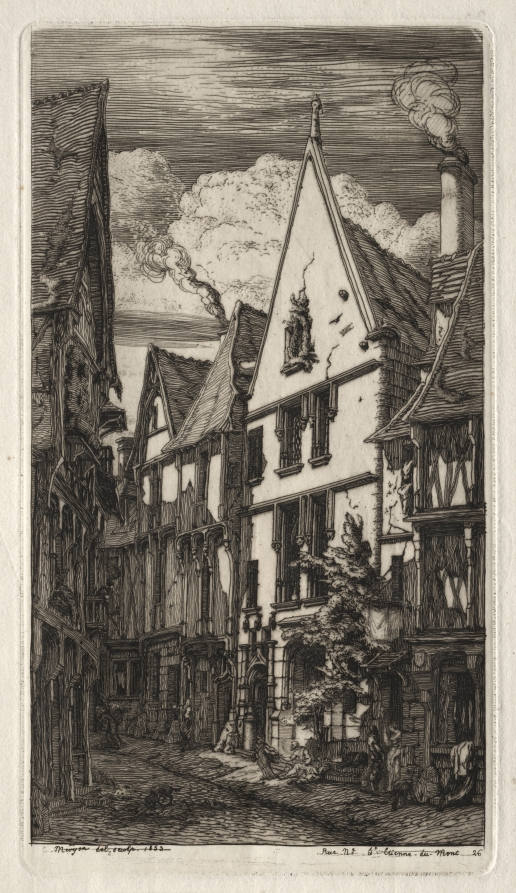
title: Etchings of Paris: à Bourges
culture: France, 19th century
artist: Charles Meryon (French, 1821–1868)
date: 1853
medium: etching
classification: Print